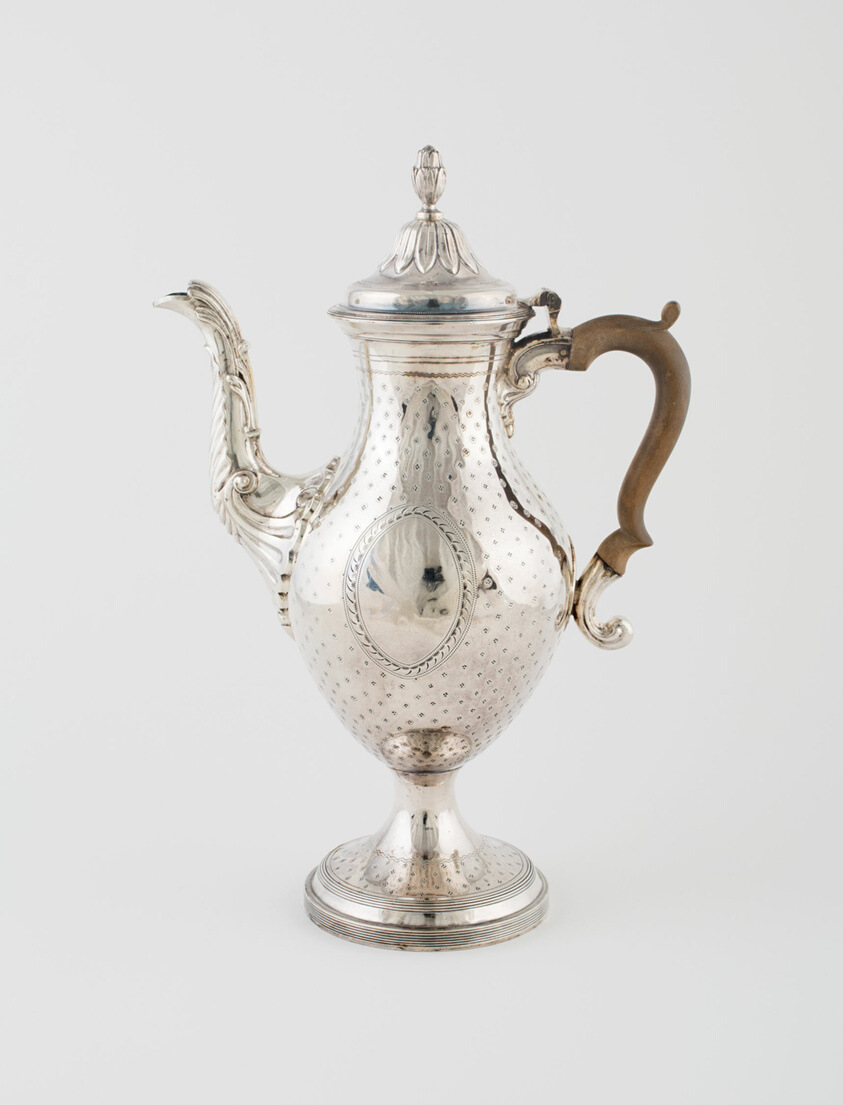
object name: Metalwork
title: Coffee Pot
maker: Charles Hougham; English, 1748-1793; London, England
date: 1789/90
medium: Silver and wood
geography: London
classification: coffeepot; vessel; coffee service; metalwork